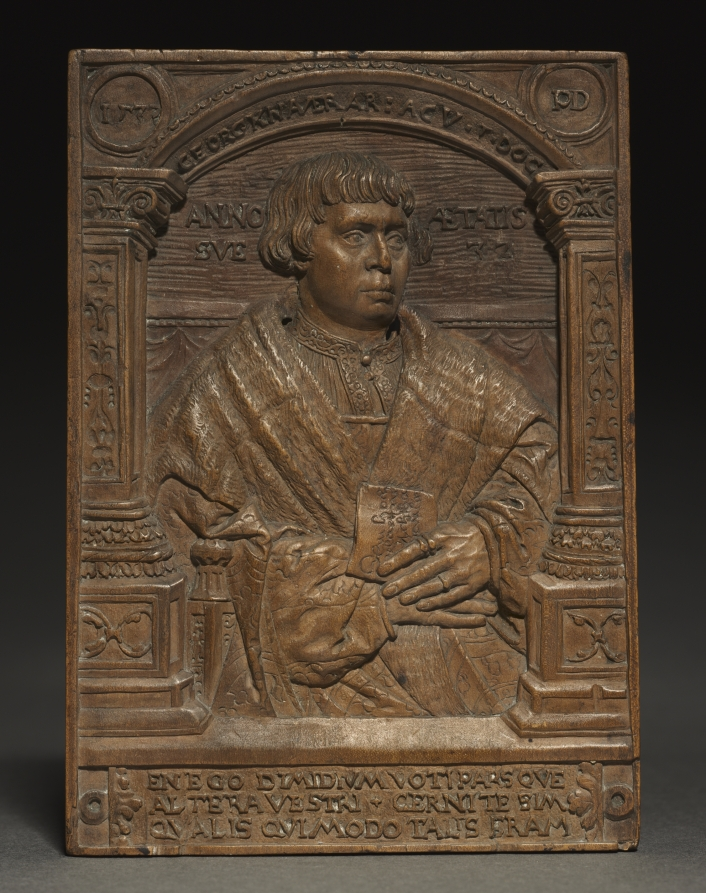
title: Portrait of Georg Knauer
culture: South Germany, 16th century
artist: Peter Dell (German, 1490–1552)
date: 1537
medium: pearwood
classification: Sculpture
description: George Knauer sits behind a classical archway holding a personal letter. His age appears in the background while the date and the artist's initials "PD" are in the corners. With this relief, Dell was competing with painted portraiture. The emergence of small portrait reliefs coincided with the growing popularity of portrait medals. Produced in limited numbers, roughly two hundred wood reliefs survive today.